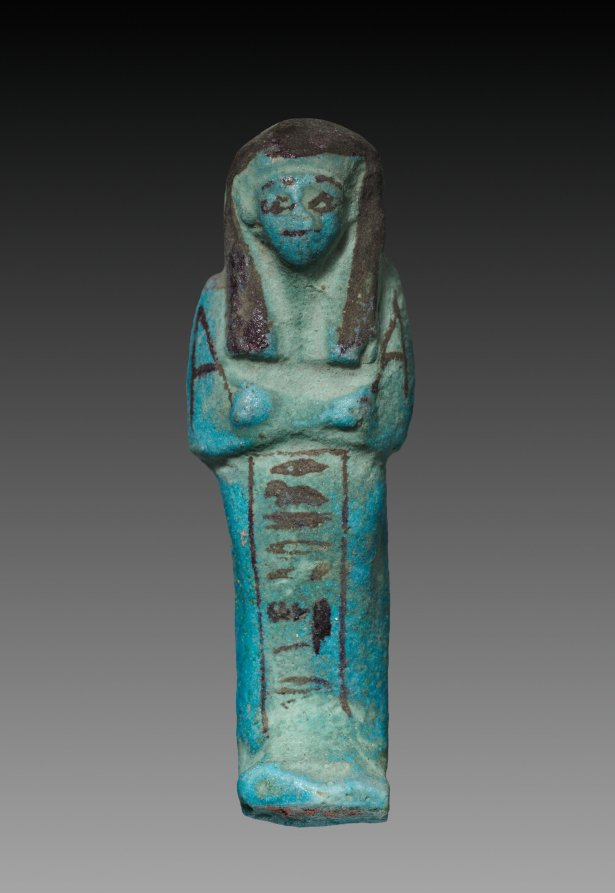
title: Shawabty of Meritamen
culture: Egypt, Third Intermediate (1069–715 BCE), Dynasty 21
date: 1000–956 BCE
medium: turquoise faience with dark purple decoration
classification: Funerary Equipment